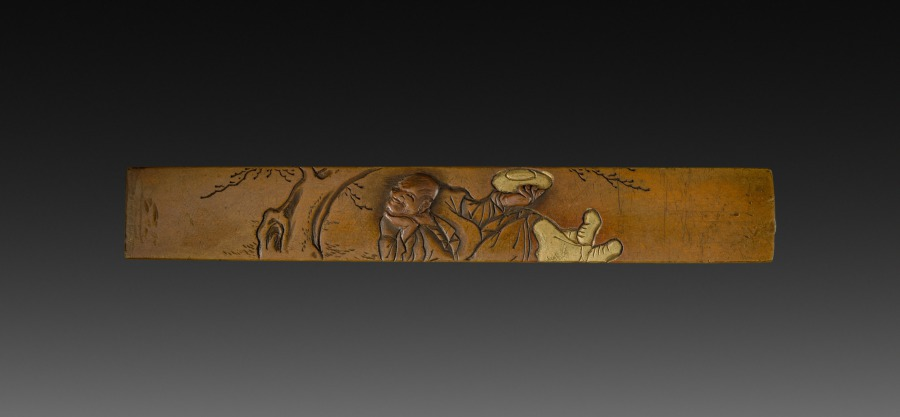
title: Knife Handle (Kozuka)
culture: Japan, Edo period (1615–1868)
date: early to mid-1800s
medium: inlaid bronze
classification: Metalwork